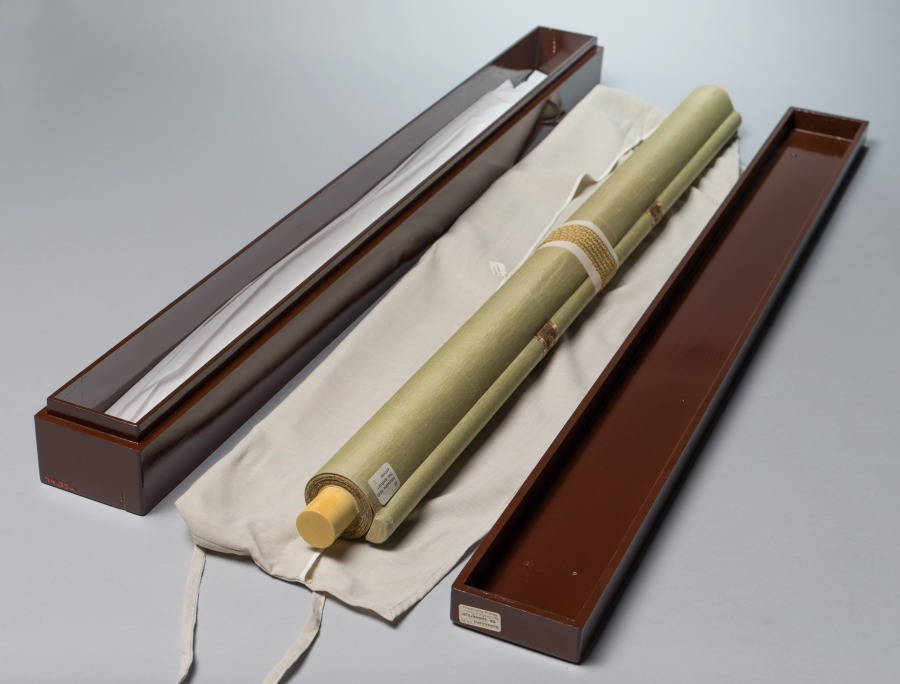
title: Buddha Amitābha with Two Attending Bodhisattvas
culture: China, Southern Song dynasty (1127-1279)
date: 1200s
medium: Hanging scroll; ink and color on silk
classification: Painting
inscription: 南無阿彌陀佛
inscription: 沙門善導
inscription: 觀世音菩薩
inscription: 大勢至菩薩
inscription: 永隆元年十月十五日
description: The supreme deities that rule over the Western Paradise—Amitābha (阿彌陀 in Chinese), Avalokiteśvara (Guanyin 觀音), and Mahāsthāmaprāpta (Dashizhi 大勢至)—are here enclosed within a circle of light. To secure entry into that paradise for Buddhist followers of the Pure Land sect, one must recite the phrase namo amituofo (南無阿彌陀佛, Homage to the Buddha Amitābha). Here the phrase is repeated 10 times in calligraphy above the figures, reinforcing the need for continual recitation.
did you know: Each line of calligraphy, which invokes the Buddha's name, emerges from a lotus blossom.